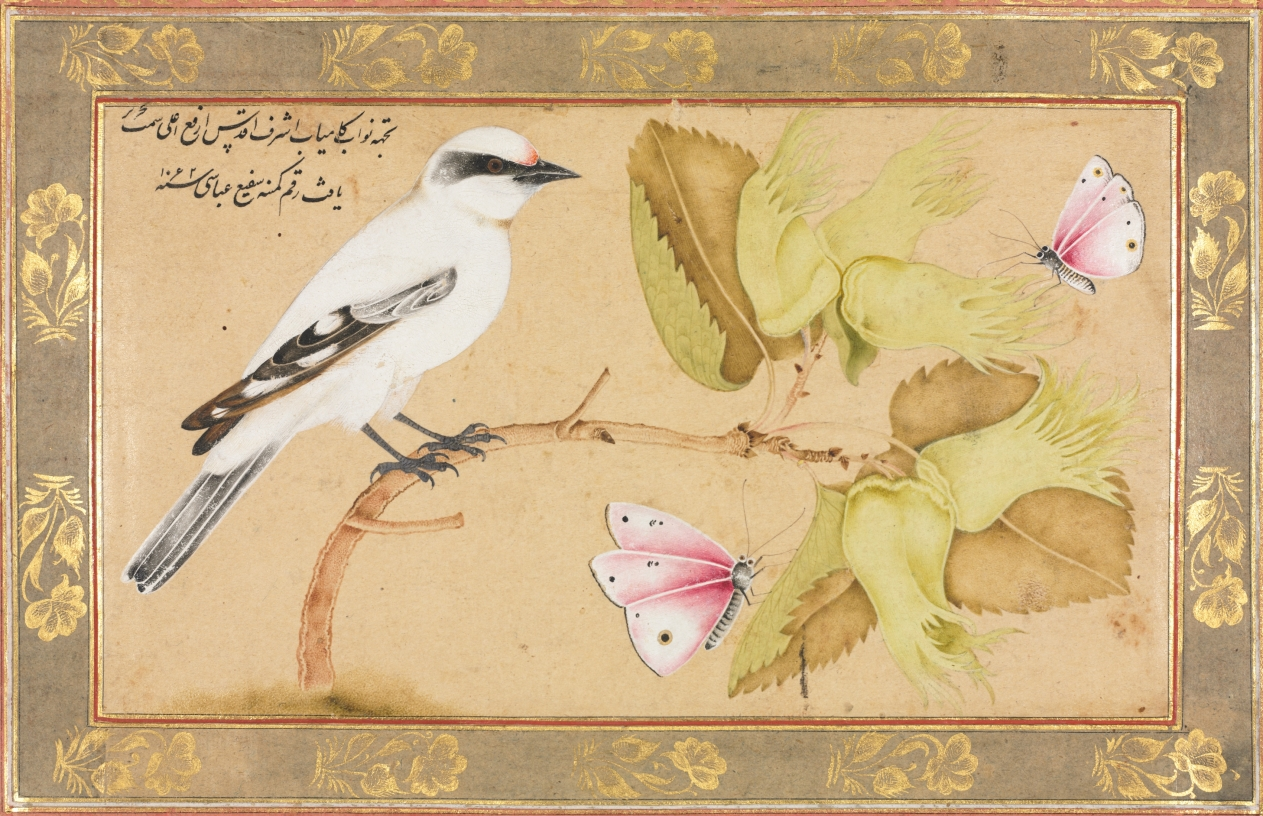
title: Black and White Bird Perched on a Shrub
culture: Iran, Isfahan, Safavid period (1501-1722)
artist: Shafi' Abbasi (Iranian)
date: 1651–52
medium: opaque watercolor, ink, and gold on paper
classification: Manuscript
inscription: "For the successful nawab, the most honorable, most holy, and most high, [who is] of exalted position, it was drawn by the qalam of the humble Shafi' 'Abbasi in the year 1062 (1651–52 AD)."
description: In Iran between the 1630s and 1650s, the court painter Shafi’ ‘Abbasi, son of the renowned painter Riza ‘Abbasi, specialized in a new fashion depicting naturalistic plants and birds, some adapted from European sources such as botanical engravings or herbals. Several have been identified as patterns for textiles, evidenced by pricked holes along the contours, which allowed designs to be transferred to another surface. The inscription indicates that Shafi’ ‘Abbasi made this painting for Shah Abbas II in 1651-52. Presumably, he copied this composition from a European engraving.